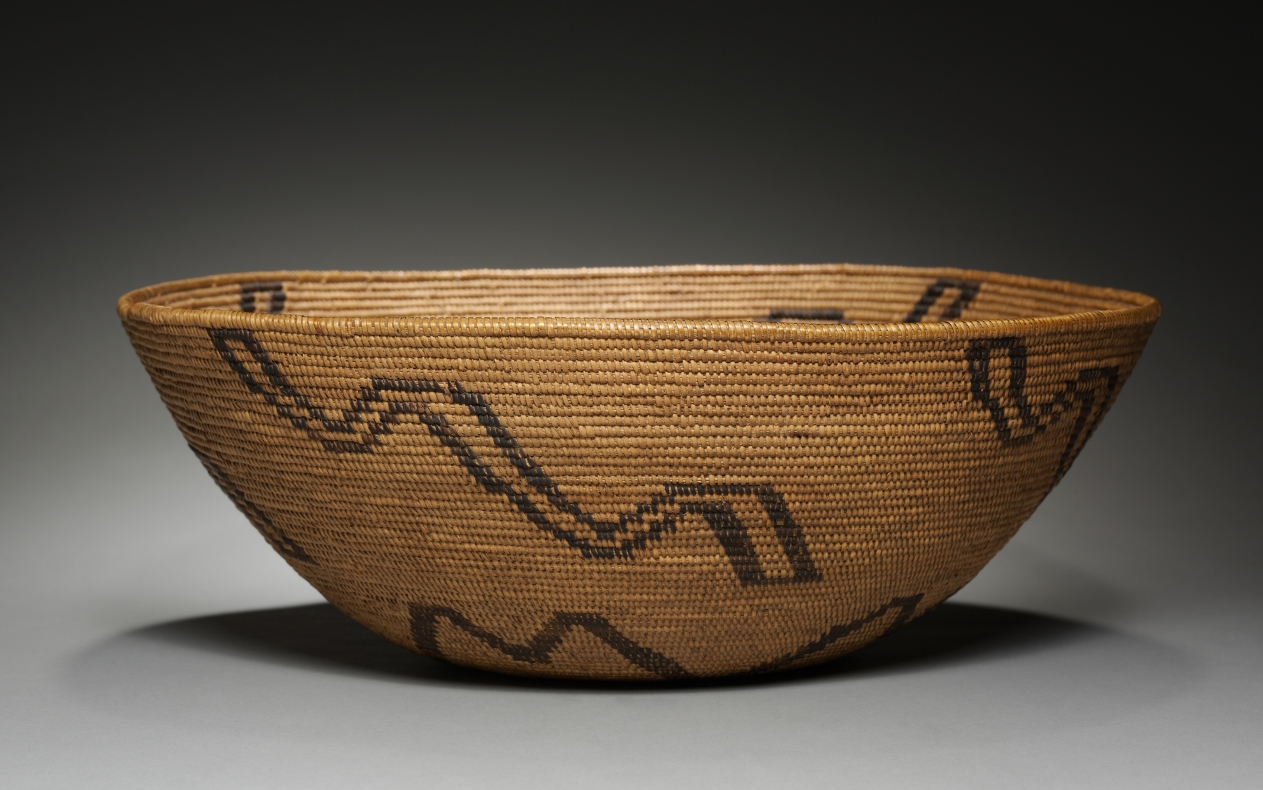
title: Food Bowl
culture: California, Southern, Gabrielino (San Gabriel, Mission or Tongva), Late 19th- Early 20th century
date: c 1875– 1925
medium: coiled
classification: Basketry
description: CMA Bulletin, December 1930